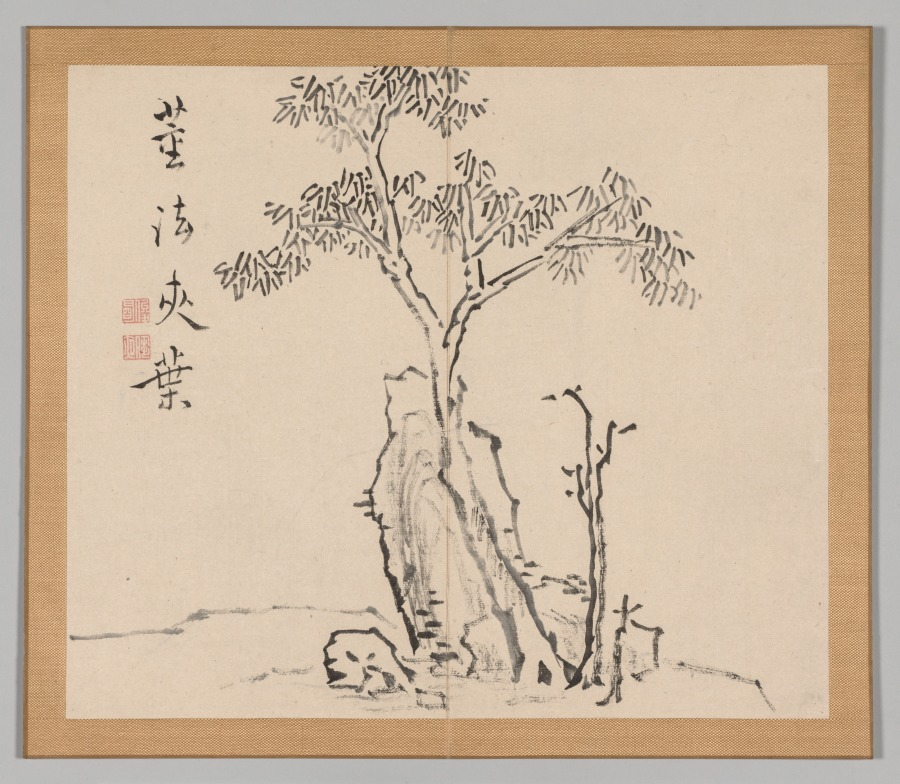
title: Reverberations of Taiga, Volume 1 (leaf 4)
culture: Japan, Edo period (1615–1868)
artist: Aoki Shukuya (Japanese, d. 1802)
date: mid- to late 1700s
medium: double-leaf from a pair of albums; ink and light color on paper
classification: Portfolio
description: Traditionally, young painters in Japan began their studies with an established master-painter. The master's compositions invariably became models that the apprentice copied to learn various ink and brush techniques. Shukuya was a pupil of the famous Kyoto artist Ikeno Taiga, whose style is reflected in these sketches of rocks, trees, and mountains.